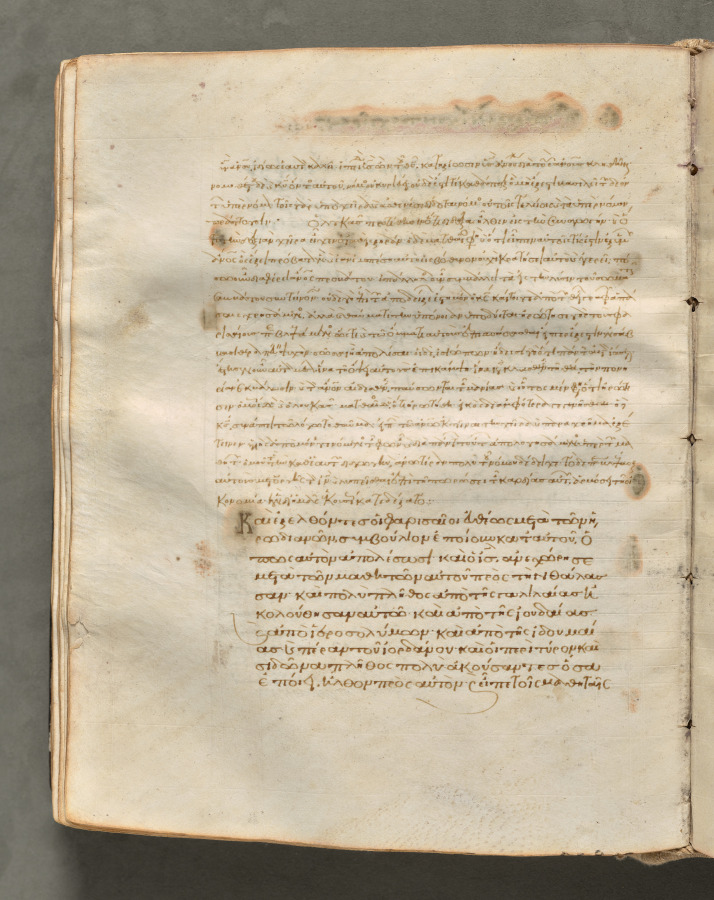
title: Text, folio 140 (verso), from a Gospel Book with Commentaries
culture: Byzantium, Constantinople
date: c. 1000–1100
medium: ink, tempera, and gold on vellum; leather binding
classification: Bound Volume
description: Each of the four gospels in this book opens on a page with brilliantly illuminated borders depicting the author of the text as well as birds-principally peacocks, symbols of the immortality of the soul-and fountains, representing the fountain of life and the salvation of the soul. This volume consists of 428 leaves with texts in Greek. Its level of sophistication suggests that it was probably written and decorated in a monastery in Constantinople.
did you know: Gospel Books were carried in procession through Byzantine churches.